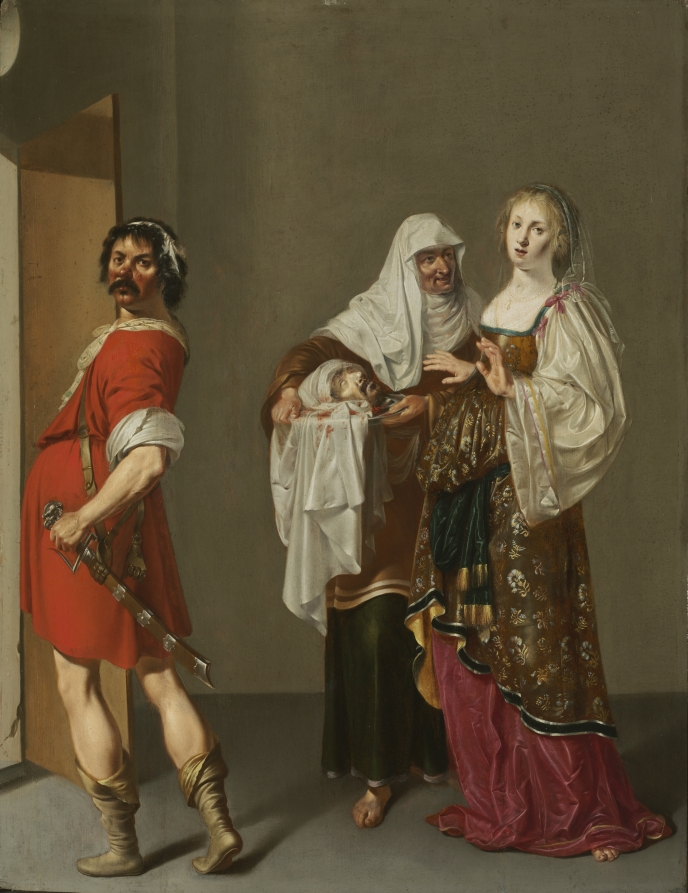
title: Salome with the Head of Saint John the Baptist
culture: Netherlands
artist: Jacob Duck (Dutch, c. 1600–1667)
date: mid-1600s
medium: oil on wood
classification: Painting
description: The colorful, exotic garments worn by the woman at the right demonstrate Jacob Duck’s skill in painting luxurious surfaces: she is Salome, daughter of Herodias. According to the New Testament, Herodias bore a grudge against John the Baptist, who condemned her marriage to Herod, ruler of Galilee and Perea. At a celebration dinner, Salome so charmed Herod with her dancing that he offered her anything she desired—and Herodias convinced Salome to demand John the Baptist’s head. Rather than depicting the actual execution, Duck focused on the executioner’s muscled physique as he departs the scene, turning to look at the viewer after having presented Salome with John’s severed head.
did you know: The pommel of the executioner's sword is decorated with a grotesque head, suggesting an ancient or exotic setting for this event.